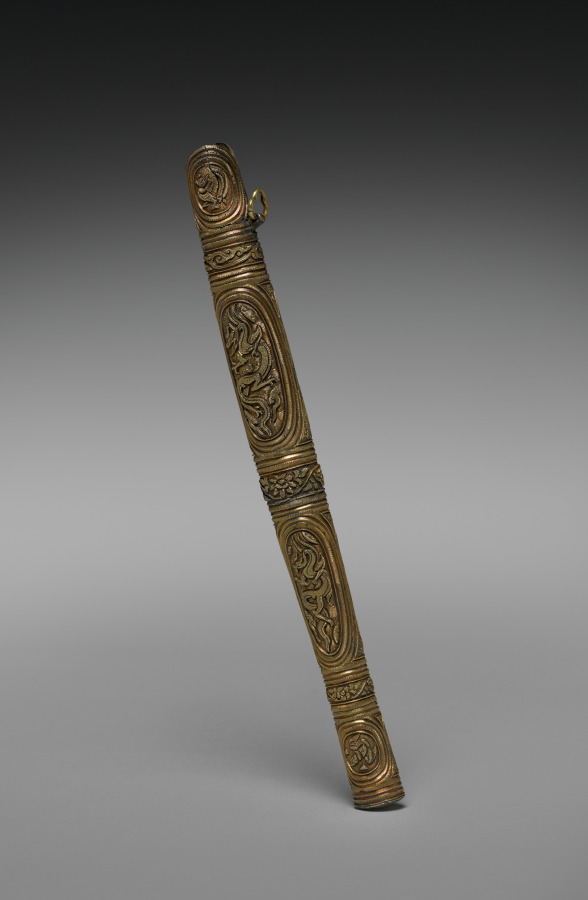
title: Knife Sheath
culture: Korea, Goryeo dynasty (918–1392)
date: 1100s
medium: Gilt silver (body) and brass (trefoil-shaped ring)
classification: Metalwork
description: Made by rolling a flat piece of silver plate, this knife sheath is decorated on each side with oval panels, including two larger middle panels showing an image of rising dragons with ring-punched scales. The circular upper panels bear the image of seated phoenixes. The flat bottom is engraved with a pair of fish, symbolizing harmonious unity. The trefoil-shaped ring attached to the tip of the sheath allows a string to connect it as a pendant to a belt. In medieval Korea, a miniature sheath such as this was considered an important fashion item, especially for elite members of the ruling class.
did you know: This 12th-century silver-gilt knife sheath is meant to be a pendent to a belt as a luxury ornament.